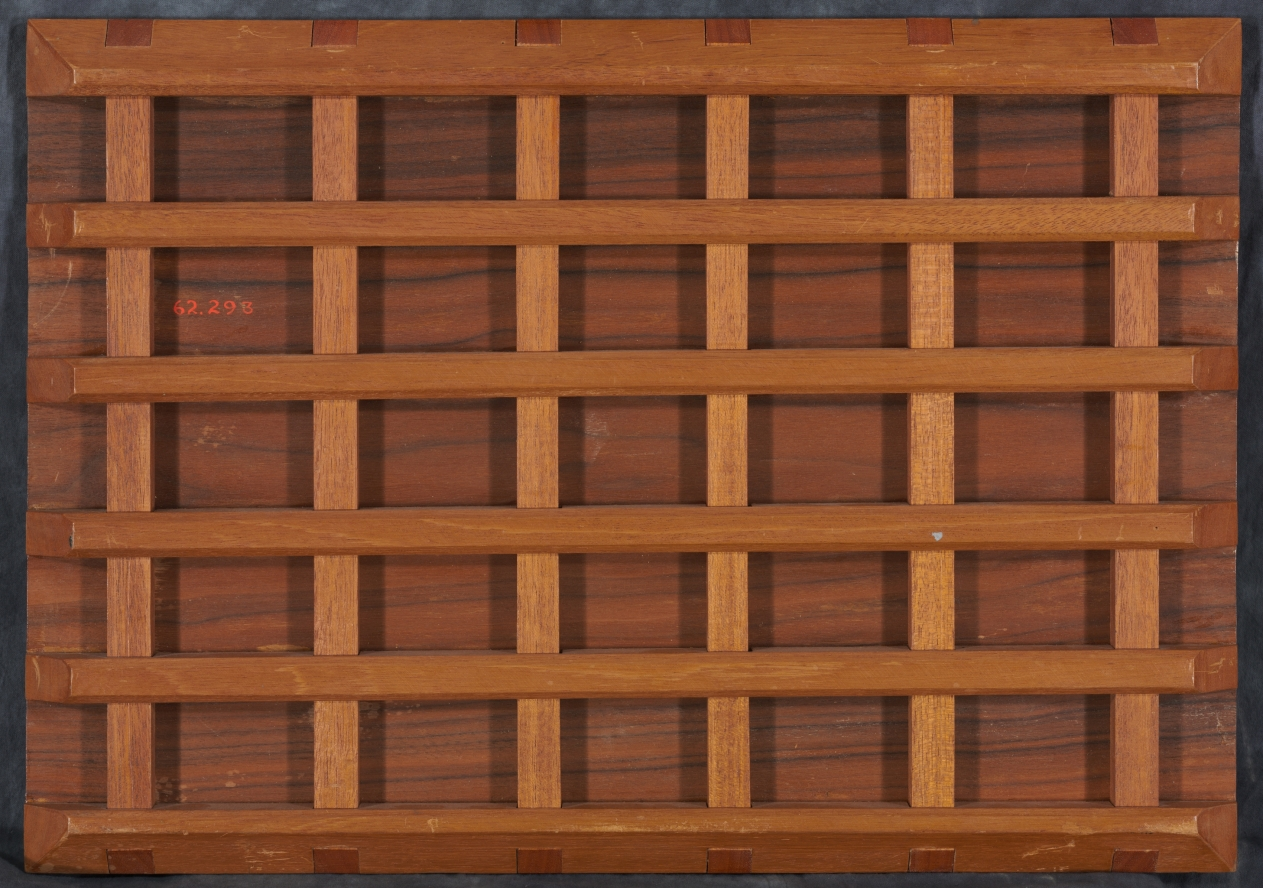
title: Landscape with Venus and Adonis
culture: Netherlands, 16th century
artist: Gillis van Coninxloo (Netherlandish, 1544–1607)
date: 1580s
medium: oil on copper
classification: Painting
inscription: Signed lower left: "GLVC [monogram]"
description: Venus, the goddess of love, is unsuccessful in dissuading her mortal lover Adonis from hunting the boar that would eventually kill him. The artist nestles this story in the foreground of an expansive view with Germanic architecture, rather than a classical setting. Woodlands were relatively new subjects in European painting and this work points toward the full-blown forested landscapes of the 1600s.